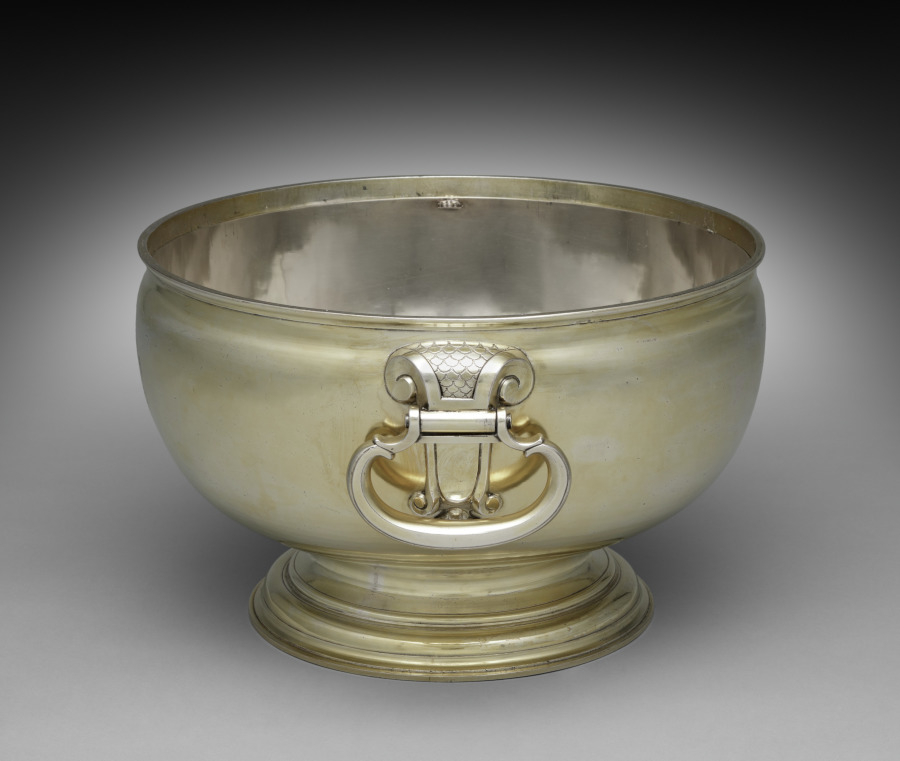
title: Bowl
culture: England, London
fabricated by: Benjamin Pyne (English, active 1693–1727)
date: 1715–16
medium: silver gilt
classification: Silver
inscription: engraved, center of bowl: arms, crest of Byam family (mantling and helmet were probably engraved at time bowl was made, crest and arms were altered to those of Byam at later date). Rim engraved with Byam Crest (also presumably not original).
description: This bowl’s notched rim allows for glasses to be suspended in water for cooling and cleansing between courses during a long dinner. The rim can be removed and the bowl used for punch as well. A year before Benjamin Pyne began this bowl, he was appointed Subordinate Goldsmith to the King in preparation for George I’s coronation (r. 1714–1727). Like much of his work, this Monteith bowl is characterized by its scale and simplicity.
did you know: The name Monteith is said to come from a mythical Scotsman named Monteigh, who wore cloaks with a similar notched pattern.